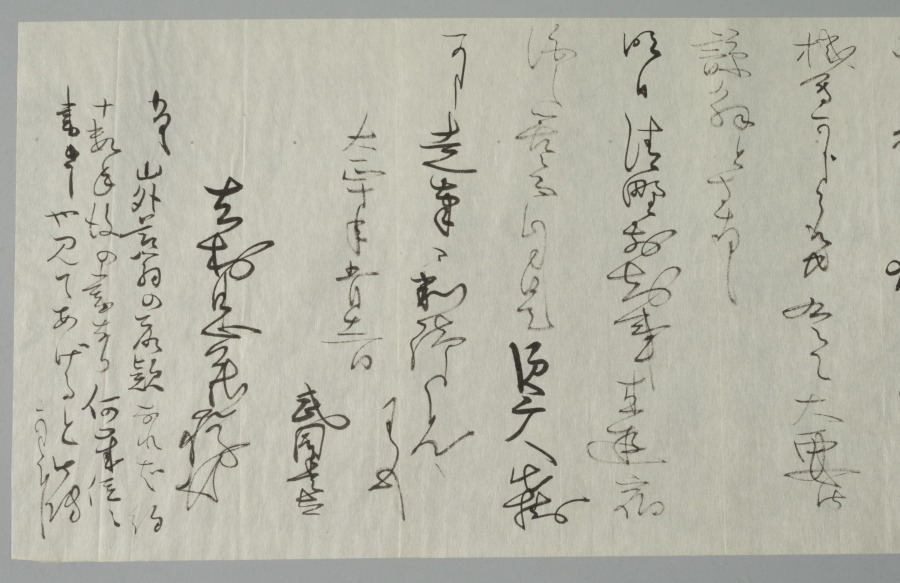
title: Courtesan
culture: Japan, Edo period (1615–1868)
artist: Matsuno Chikanobu (Japanese, active 1716–35)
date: 1716–35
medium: hanging scroll; ink and color on paper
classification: Painting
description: A glamorous courtesan sports an outer robe decorated with large roundels featuring plant motifs including iris and bush clover. Little is known about the life and artistic training of the painter Matsuno Chikanobu, an ukiyo-e artist who painted in a style strongly reminiscent of that of the Kaigetsudō studio. Many of his known paintings are on silk, and executed with high quality pigments, indicating that his primary clientele were wealthy individuals.